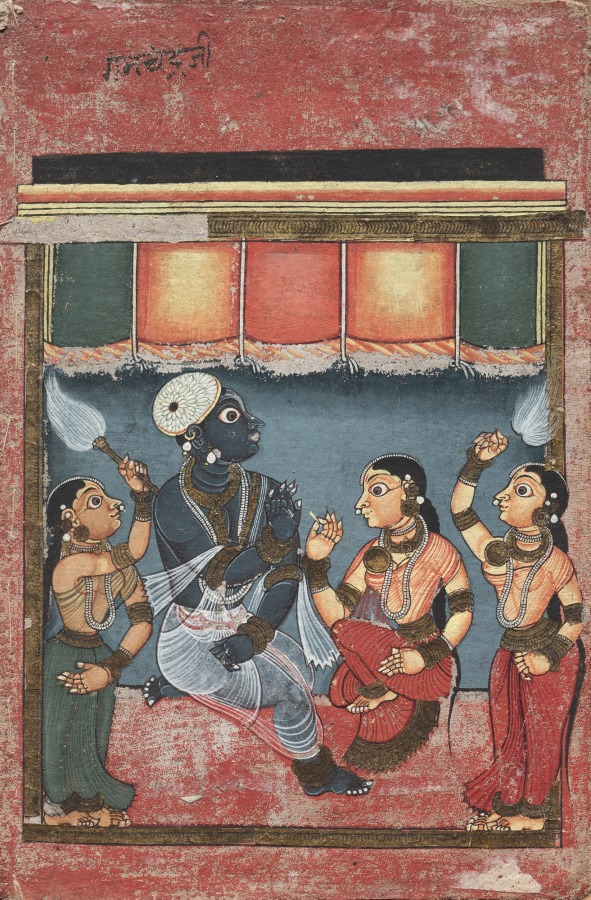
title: Krishna with Radha and Two Attendants (recto); Jagannath, Subhadra and Balarama in an Arch (verso)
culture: Southern India, Andhra Pradesh, possibly Tirupati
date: 1700s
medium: color on cloth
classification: Painting